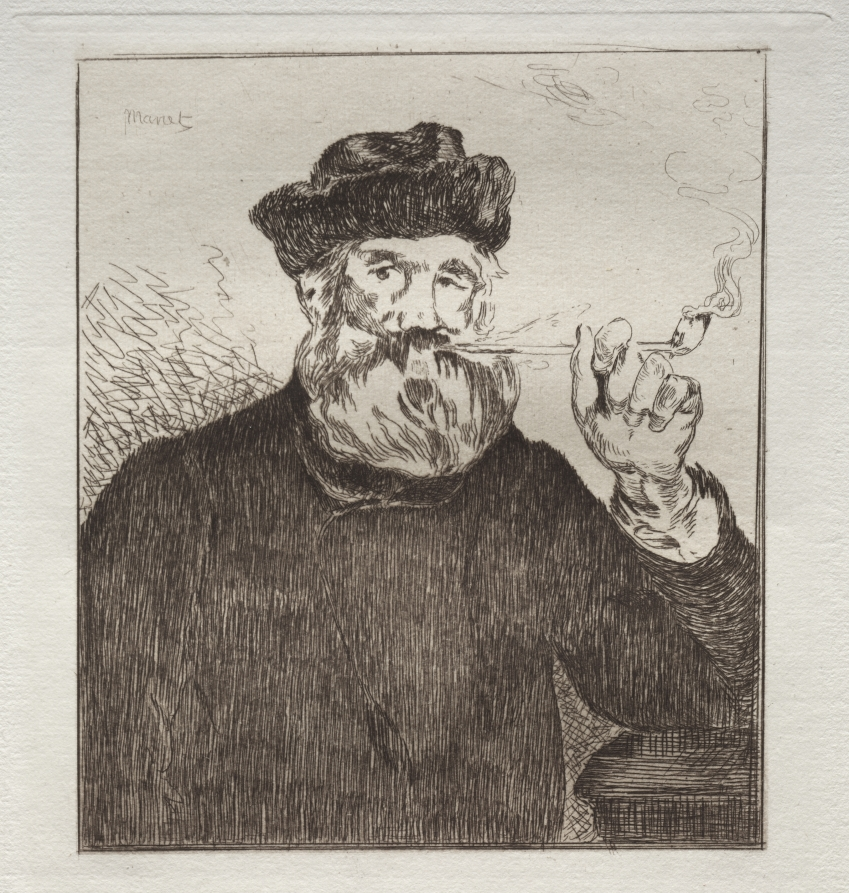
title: The Smoker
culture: France, 19th century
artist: Édouard Manet (French, 1832–1883)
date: 1866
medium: etching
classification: Print